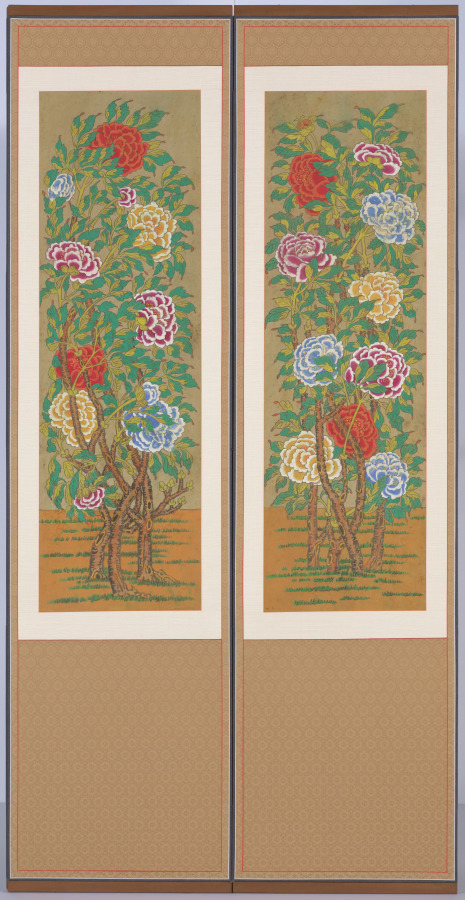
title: Peonies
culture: Korea, Joseon dynasty (1392−1910) or Japanese colonial period (1910−1945)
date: early 1900s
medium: Eight-panel folding screen; ink and color on silk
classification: Painting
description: By the late nineteenth century, peony paintings with bold designs and striking graphic stylization were increasingly produced and consumed by middle-class members because of its symbolic meaning: prosperity and wealth. This early 20th-century folding screen of peonies may have used for festive occasions such as weddings.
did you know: This early 20th-century folding screen has both sides painted with the image of bloomed peonies.